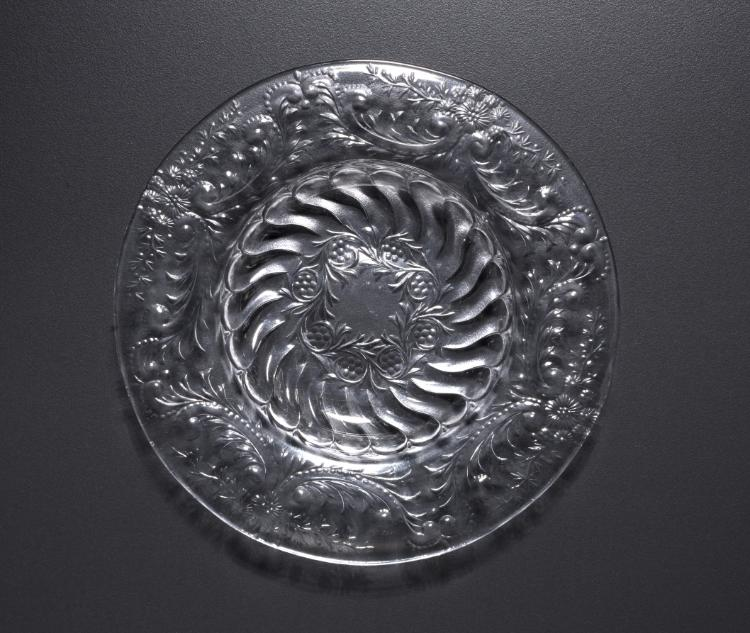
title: Small Plate from a Place Setting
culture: probably America, late 19th-early 20th century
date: c. 1890–1920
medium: glass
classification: Glass